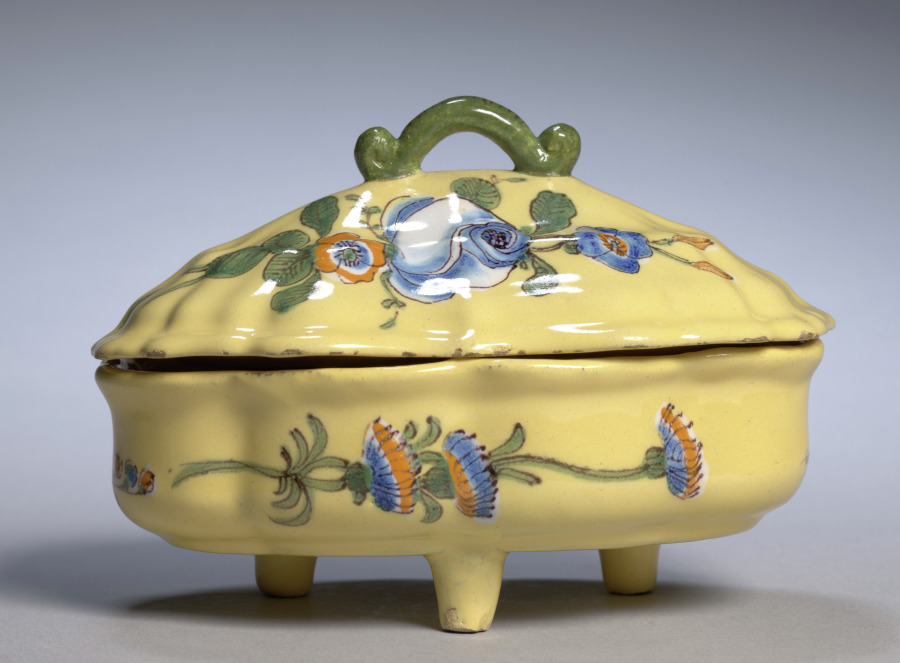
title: Covered Spice Bowl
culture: France, Montpellier, 18th century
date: c. 1775–80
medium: faience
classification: Ceramic